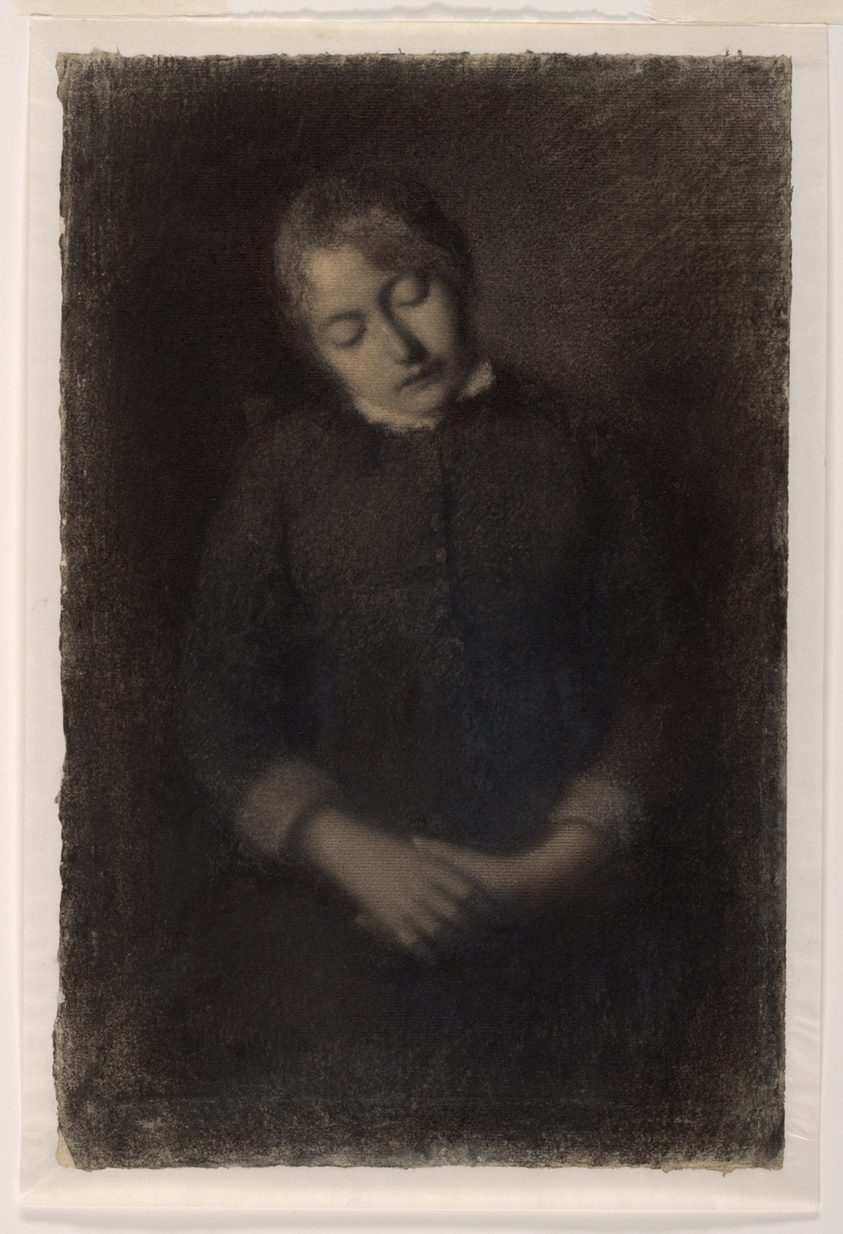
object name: Drawing and Watercolor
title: Portrait of the Artist's Wife Asleep (Marie Guilloux)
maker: Albert-Charles Lebourg; French, 1849-1928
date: c. 1880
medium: Black chalk and charcoal, with stumping, on buff laid paper, laid down on cream Japanese paper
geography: France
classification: chalk; drawings (visual works); prints and drawing